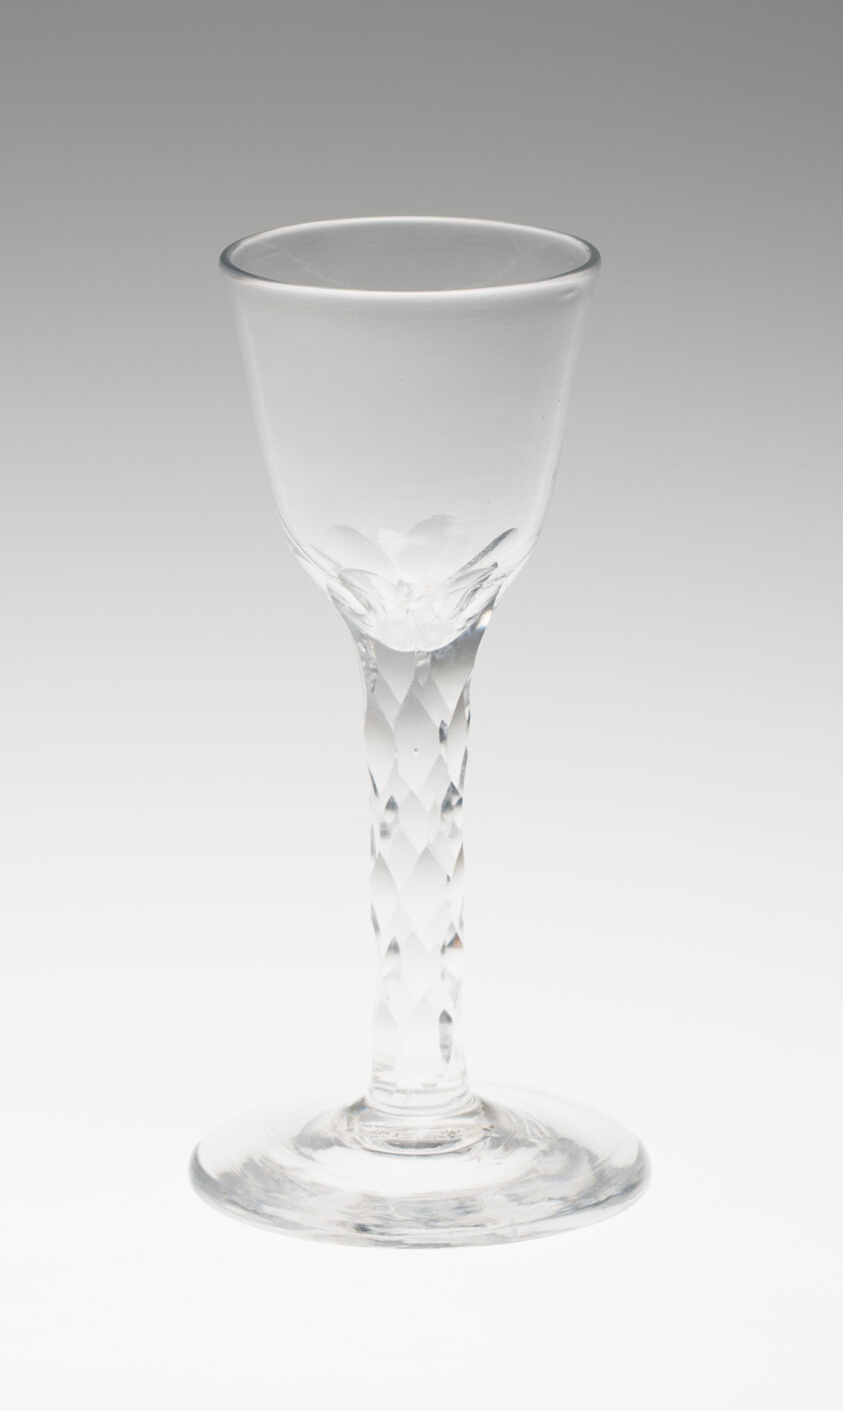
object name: Glass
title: Wine Glass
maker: England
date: c. 1770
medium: Glass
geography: England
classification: drinking vessel; glass